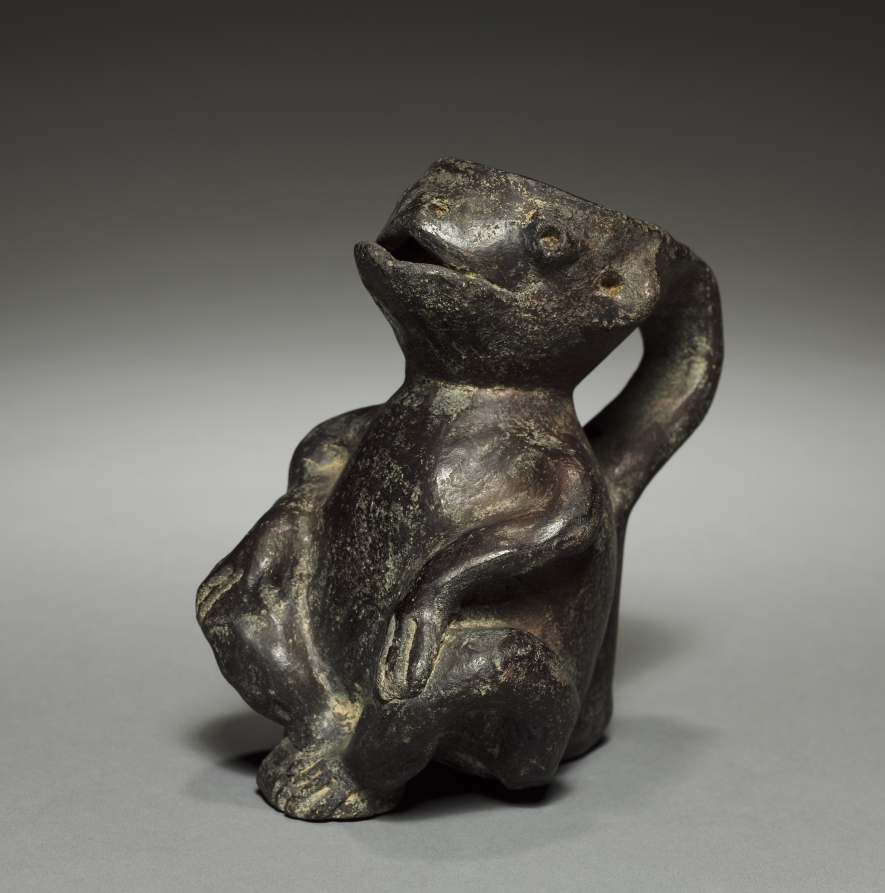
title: Seated Figure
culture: Colombia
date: before 1921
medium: pottery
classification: Ceramic